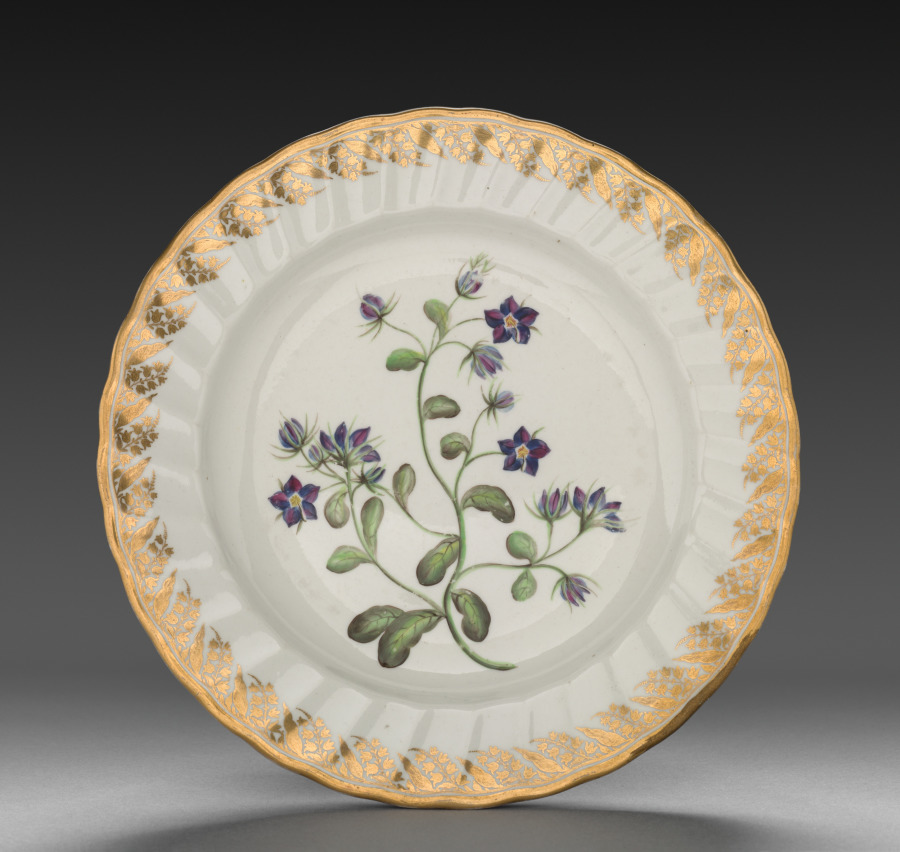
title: Plate from Dessert Service: Venus Looking Glass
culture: England, Derby, 18th century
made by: Derby (Crown Derby Period) (British)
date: c. 1800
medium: porcelain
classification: Ceramic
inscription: inscribed in blue on back: Venuf's Looking Glafs./ crown/ crossed batons and dots/D/115.